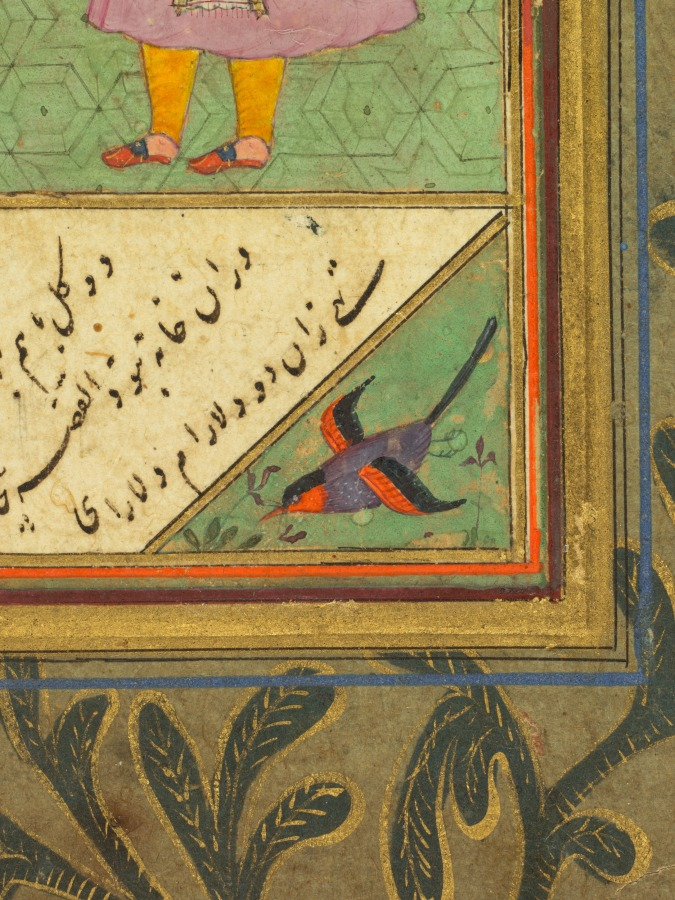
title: Zulaykha in her palace and as an elderly woman with Joseph (recto), from a Panj Ganj (Five Treasures) of Abd al- Rahman Jami (Persian, 1414–1492)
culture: Western Afghanistan, Herat (text); Mughal India (paintings)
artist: Mushfiq (Indian, active early 1600s)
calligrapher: Sultan 'Ali al-Mashadi (Iranian, 1430–1520)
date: 1603–7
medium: Gum tempera, ink, and gold on paper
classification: Painting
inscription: [[Upper left of painting, against a red background, in nasta’liq script]] ' amal - i Mushfiq sana 1015 Text on verso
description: The golden pot of white narcissus flowers at the bottom center of the painting signals that Zulaykha, leaning on her staff to the left, will imminently have her youth and beauty restored. In this Persian retelling of the Old Testament account from the Bible, Zulaykha lusted after Joseph, even though she was already married to Potiphar. Joseph, with the golden halo, resisted her advances until she became a widow and retained his youth, because of his extreme virtue. Above, Zulaykha as a young woman waits for Joseph in her house where murals of them as a happy couple are painted on the walls.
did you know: Zulaykha is shown four times: twice in the murals, seated in the center, and below when she is much older.